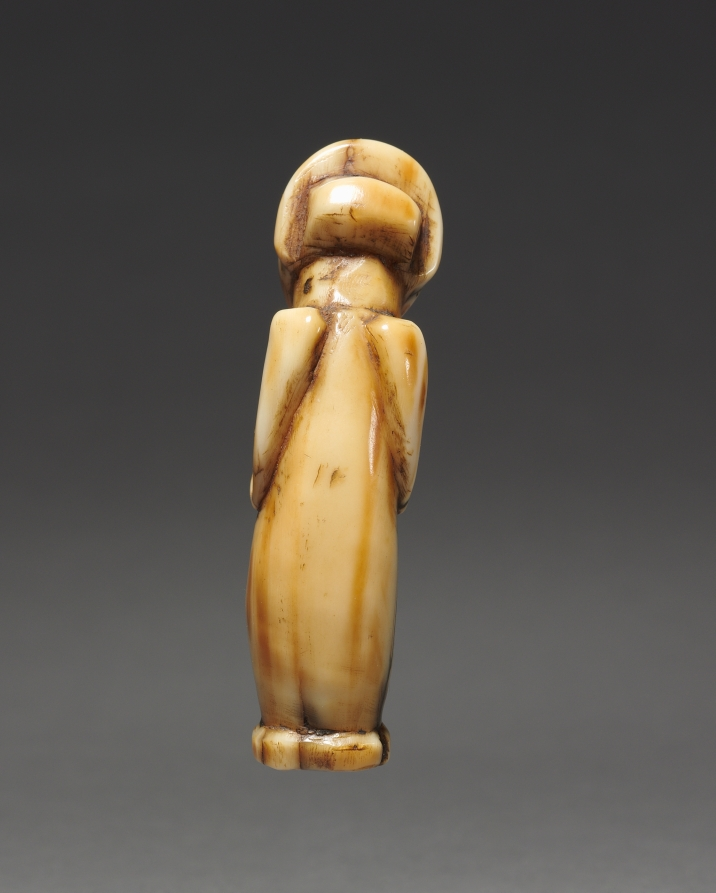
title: Pendant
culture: Africa, Central Africa, Democratic Republic of Congo, Luba-style maker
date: late 1800s–early 1900s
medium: Ivory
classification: Jewelry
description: Luba pendants made in ivory or bone were originally suspended on a cord and worn diagonally across the chest of a high-ranking member of society. Often accompanied by amulets, beads, or small antelope horns, they represented ancestral spirits and served as portals to ancestral wisdom and beneficence. Many of these diminutive figurines hold their hands to their breasts as a sign of the secrets and wisdom they contain.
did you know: The caramel-colored patina of the ivory indicates the frequent usage of the pendant.